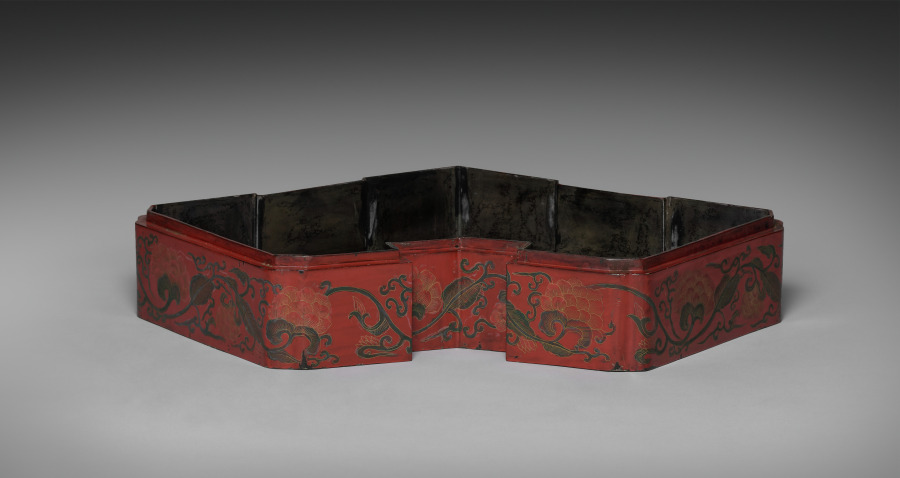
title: Middle Tier Box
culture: Japan, Edo period (1615–1868)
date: late 1700s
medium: red lacquer over a wood core, with litharge painting and engraved gold designs (Ryukyuan)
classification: Lacquer